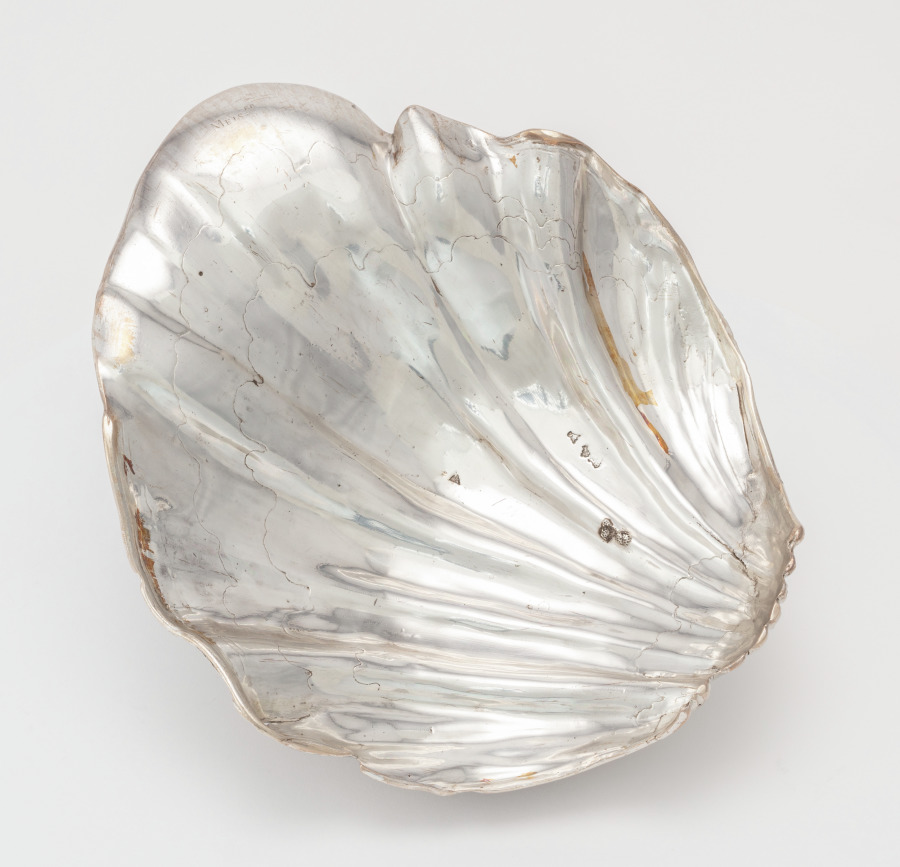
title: Cover for a Tureen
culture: France, Paris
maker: Henry Adnet (French, 1745)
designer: Juste-Aurèle Meissonnier (French, 1695–1750)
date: 1735–38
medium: silver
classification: Silver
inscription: engraved Meissonnier signature.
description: See entry for cover record 1977.182.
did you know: The langoustine, pigeon, and vegetables were cast using real examples giving the silver copies lifelike detail and appearance.